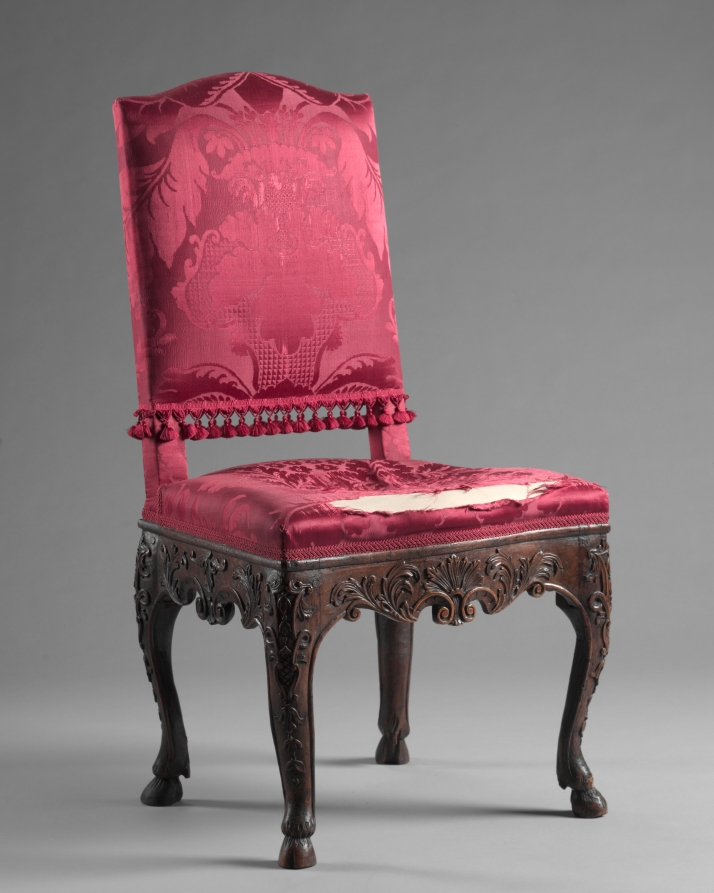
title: Side Chair (2 of 2)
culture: Germany, Belgium, or the Netherlands, early 18th century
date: early 1700s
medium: walnut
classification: Furniture and woodwork